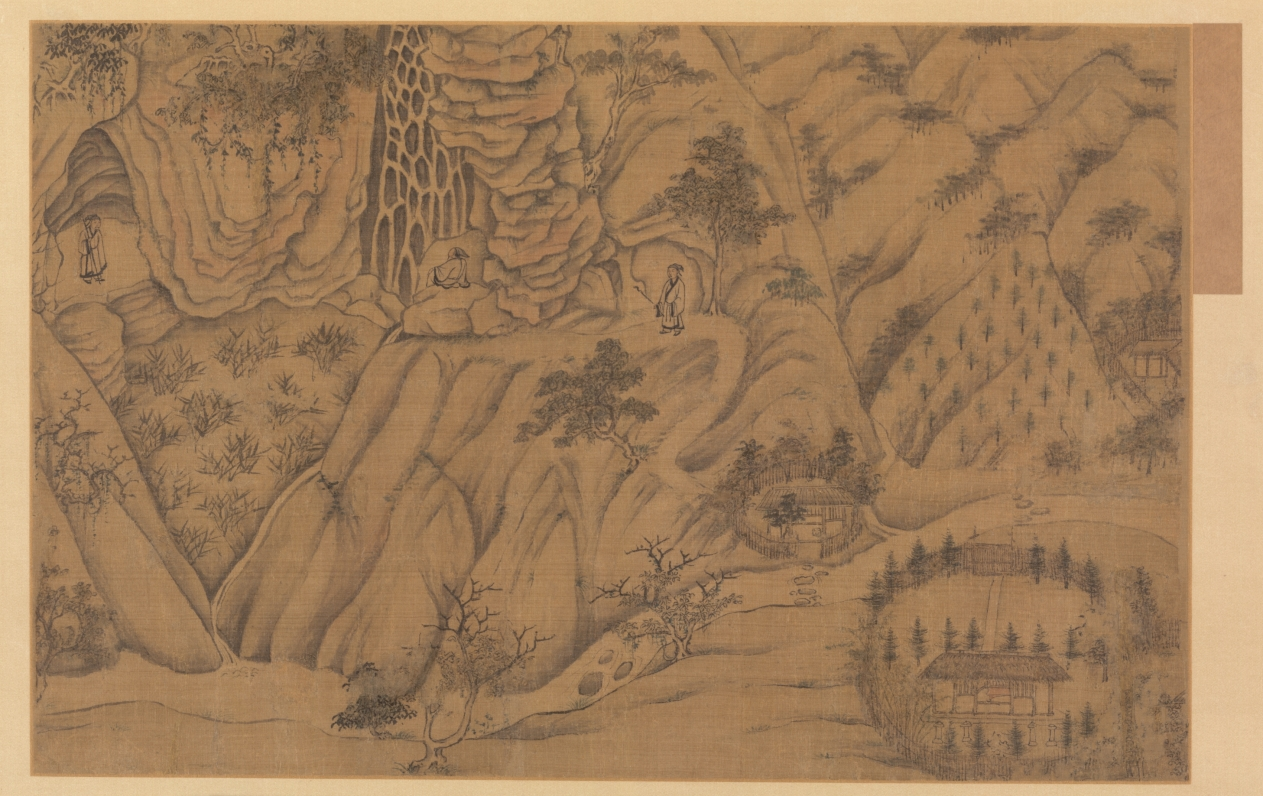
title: Dwelling in the Longmian ("Sleeping Dragon") Mountains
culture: China, Song dynasty (960-1279) - Yuan dynasty (1271-1368)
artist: follower of Li Gonglin (Chinese, c. 1049–1106)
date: 1100s-1200s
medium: handscroll mounted as an album leaf; ink and color on silk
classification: Painting